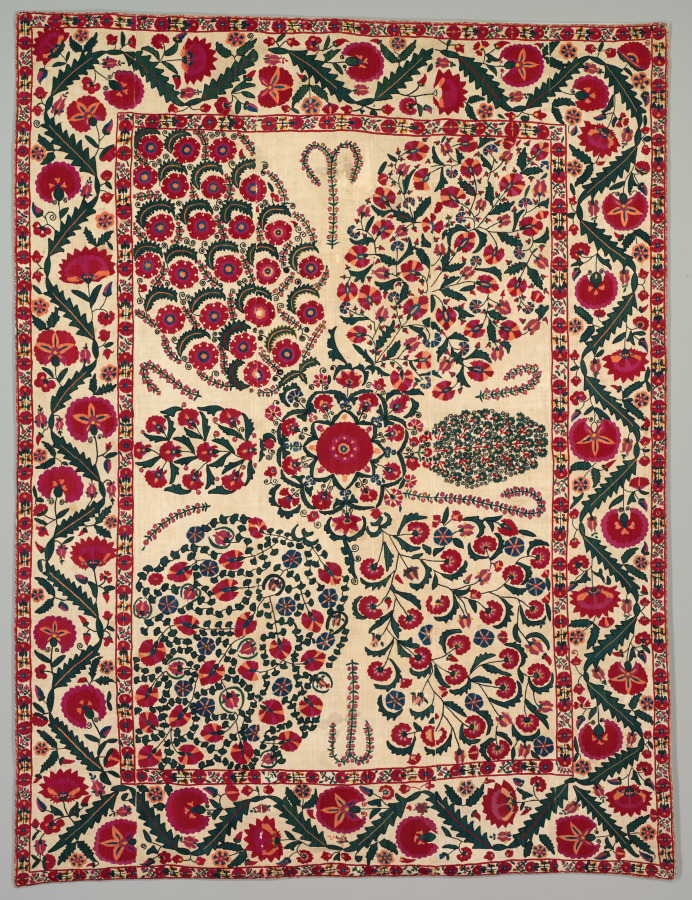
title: Suzani with floral sprays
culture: Central Asia, South West Uzbekistan, Shakhrisyabz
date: 1800–1850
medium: Cotton: plain weave, 6 strips; silk: embroidery; filling stitch: kanda xajol, occasionally bosma; outlining stitch: ilmoq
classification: Embroidery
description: Embroidered textiles were essential items in dowries. This type, known as a suzani after the Persian and Tajik word for needle, suzan, were created by mothers and daughters who proudly displayed them during wedding festivities and special occasions. This is an especially striking example, probably embroidered in Shakhrisyabz, located south of Samarkand in Uzbekistan, during 1800–1850. Suzani were made for numerous functions including the nuptial bed, curtains for storage niches, and wrappers for various dry goods. Floral and foliate motifs generally dominate as seen here, enriched with several shades of red and enhanced by the varied light reflections and colors of the silk thread. Possibly the motifs conveyed cosmological, apotropaic, medicinal, or fertility associations especially for married life. Patterns were drawn in black ink on several loosely joined cotton cloths by a skilled family member or a professional. The cloths were then separated, embroidered individually, and reattached, confirmed by mismatched motifs where the lengths are joined. They are generally attributed to nineteenth-century production after sericulture was introduced in the Merv area around 1800.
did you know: Six narrow lengths of handwoven cotton cloth were joined and then embroidered with vibrant silk thread to make this suzani.